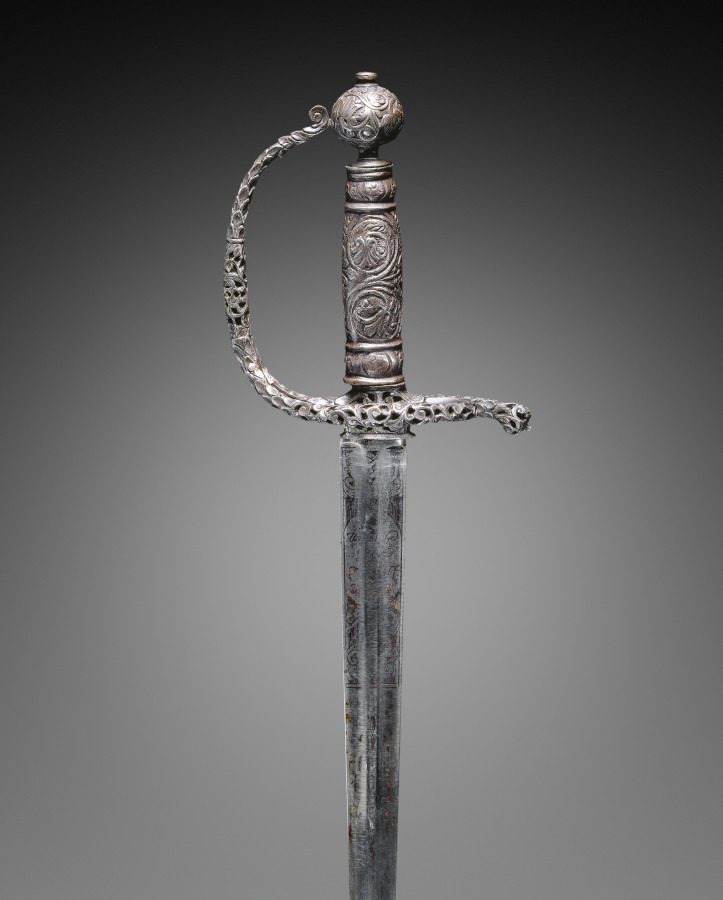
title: Small Sword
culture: England, 17th century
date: c. 1650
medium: steel, pierced, chiseled, and engraved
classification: Arms and Armor